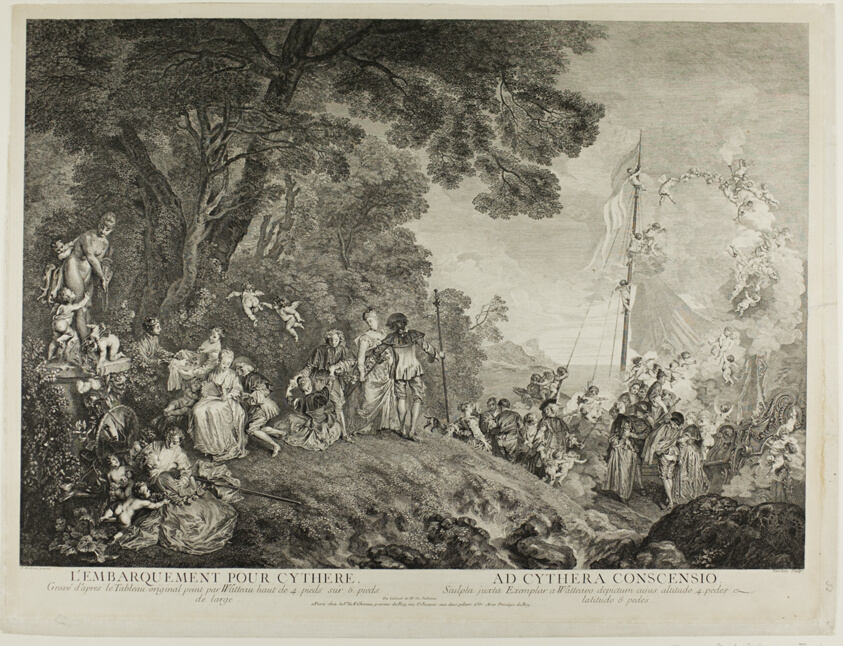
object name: Print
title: Pilgrimage to the Island of Cythera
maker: Nicolas Henri Tardieu (French, 1674-1749); after Jean Antoine Watteau (French, 1684-1721)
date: c. 1733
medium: Etching and engraving on ivory laid paper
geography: France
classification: engraving; print; prints and drawing